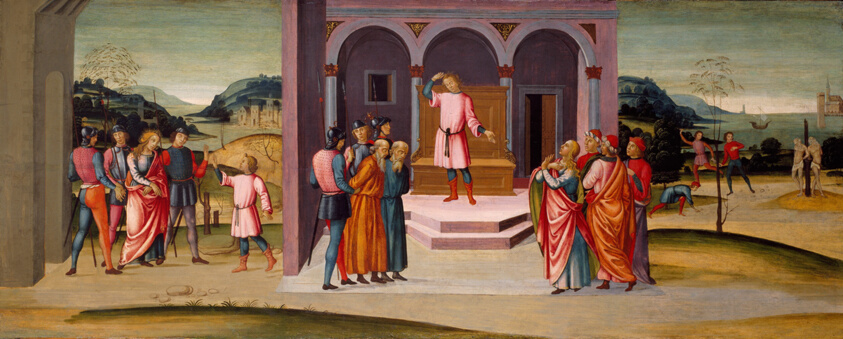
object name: Painting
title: Daniel Saving Susanna, the Judgment of Daniel, and the Execution of the Elders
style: sixteenth century, Renaissance, 16th Century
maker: Master of Apollo and Daphne (Italian, active c. 1480–1510)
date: c. 1500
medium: Tempera on panel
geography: Florence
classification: tempera; paint; narrative; Italian; painting; european painting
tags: Old Testament, boats, women, woman, weapons, water, trees, towns, spears, soldiers, religious scenes, religious figures, religious, religion, Narrative, men, landscape, interior, hills, figures, figure